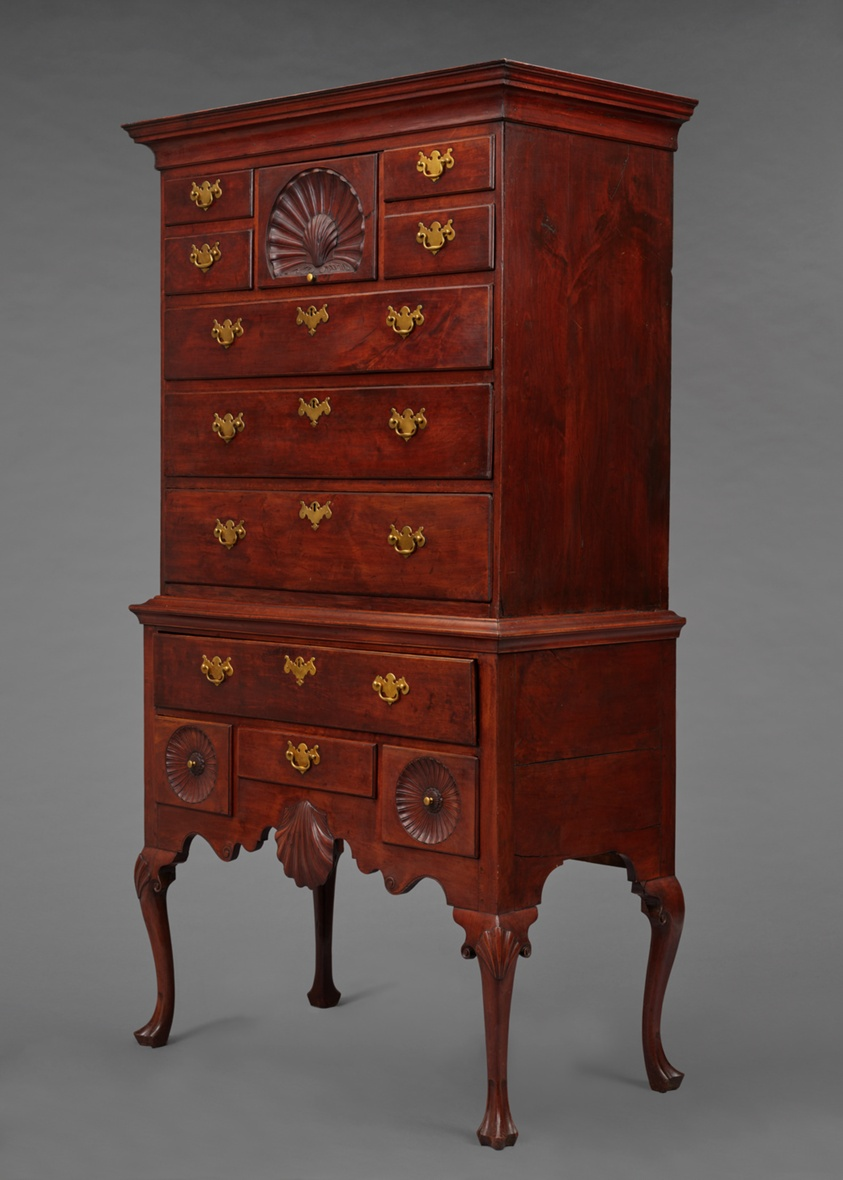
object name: Furniture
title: High Chest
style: queen anne, 18th Century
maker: Artist unknown (American, 18th century); Pennsylvania or New Jersey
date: 1740–60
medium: Cherry and brass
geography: United States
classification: american decorative arts; american arts; furniture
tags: clam shell, scalloping